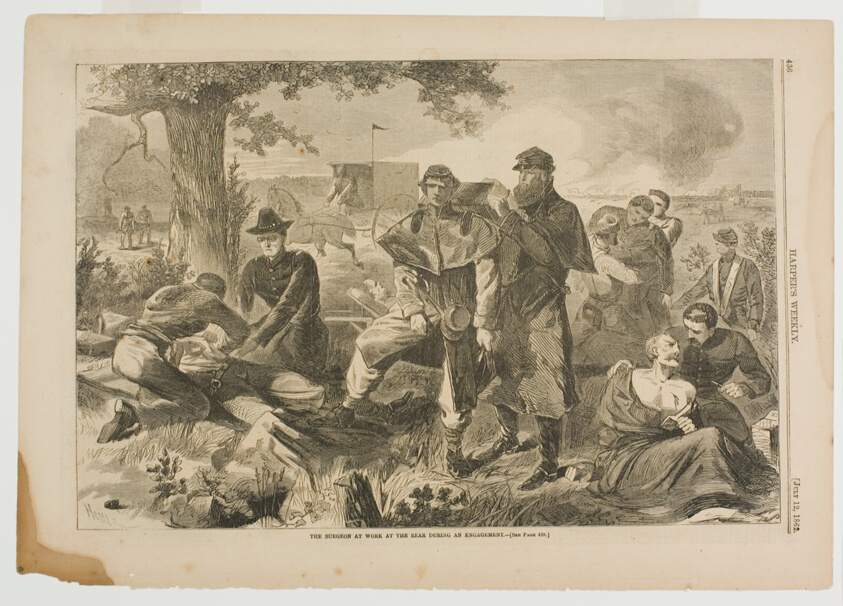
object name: Print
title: The Surgeon at Work at the Rear During an Engagement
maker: Winslow Homer (American, 1836-1910); published by Harper's Weekly (American, 1857-1916)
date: published July 12, 1862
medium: Wood engraving on paper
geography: United States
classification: wood engraving; print; prints and drawing